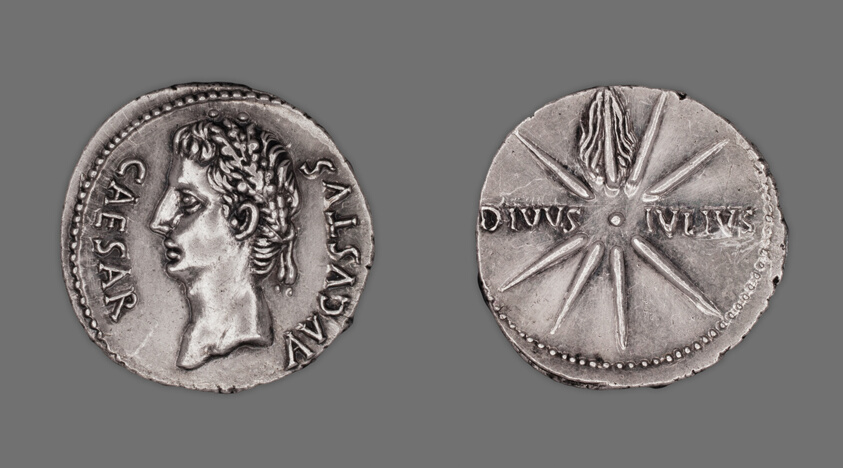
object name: Coin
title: Denarius (Coin) Portraying Emperor Augustus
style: roman (ancient, style or period), ancient, republic period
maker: Roman; minted in Spain, possibly Colonia Caesaraugusta (Zaragoza) or Colonia Patricia (Cordoba)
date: 19-18 BCE, issued by Augustus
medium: Silver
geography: Spain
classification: coin; ancient art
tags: portraits